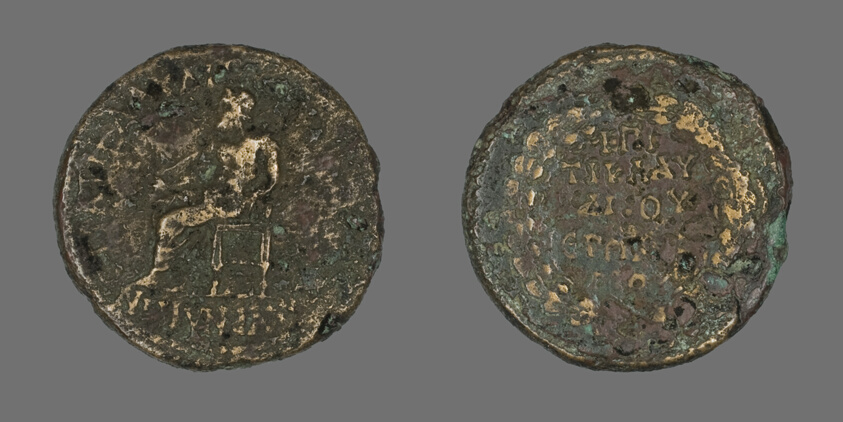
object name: Coin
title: Coin Depicting Zeus Akraios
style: roman (ancient, style or period)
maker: Roman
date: 14-37 CE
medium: Bronze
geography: Roman Empire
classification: coin; ancient art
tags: gods (deities), zeus